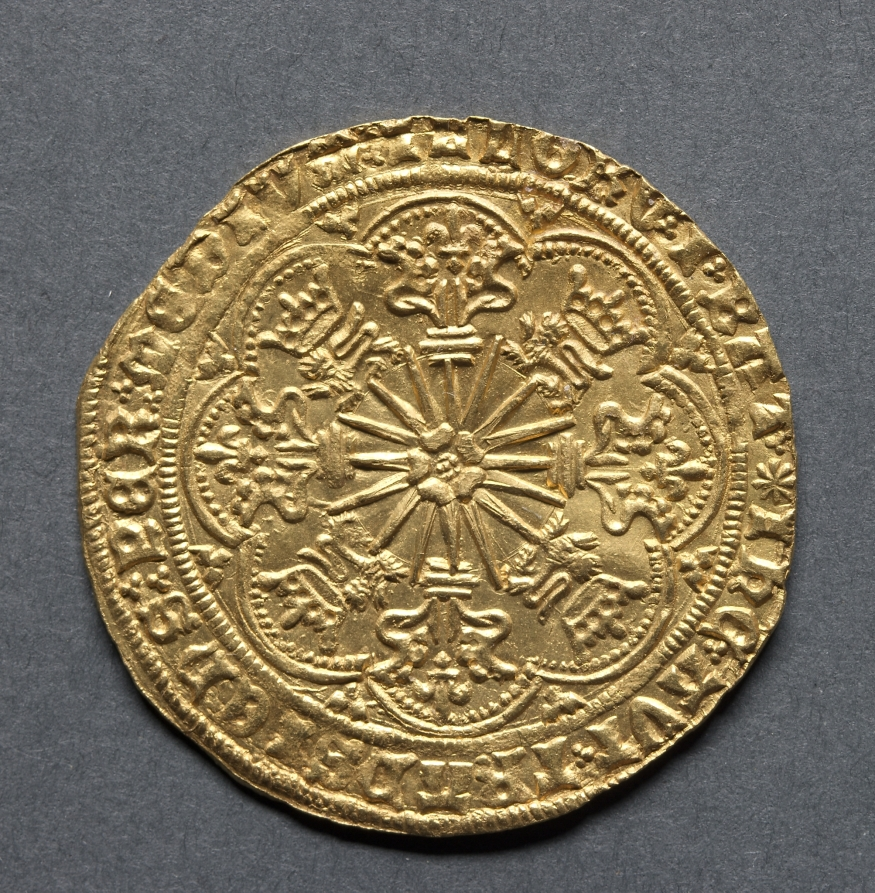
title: Ryal: Sun with Fleurs (reverse)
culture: England, Edward IV (first reign 1461-1470, second reign 1471-1483)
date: 1464/5–1470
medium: gold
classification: Coins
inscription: IhC’ · ΛVT’ · TRΛnSIЄnS · PER · mЄDIVm · ILLORVm : I · BΛT